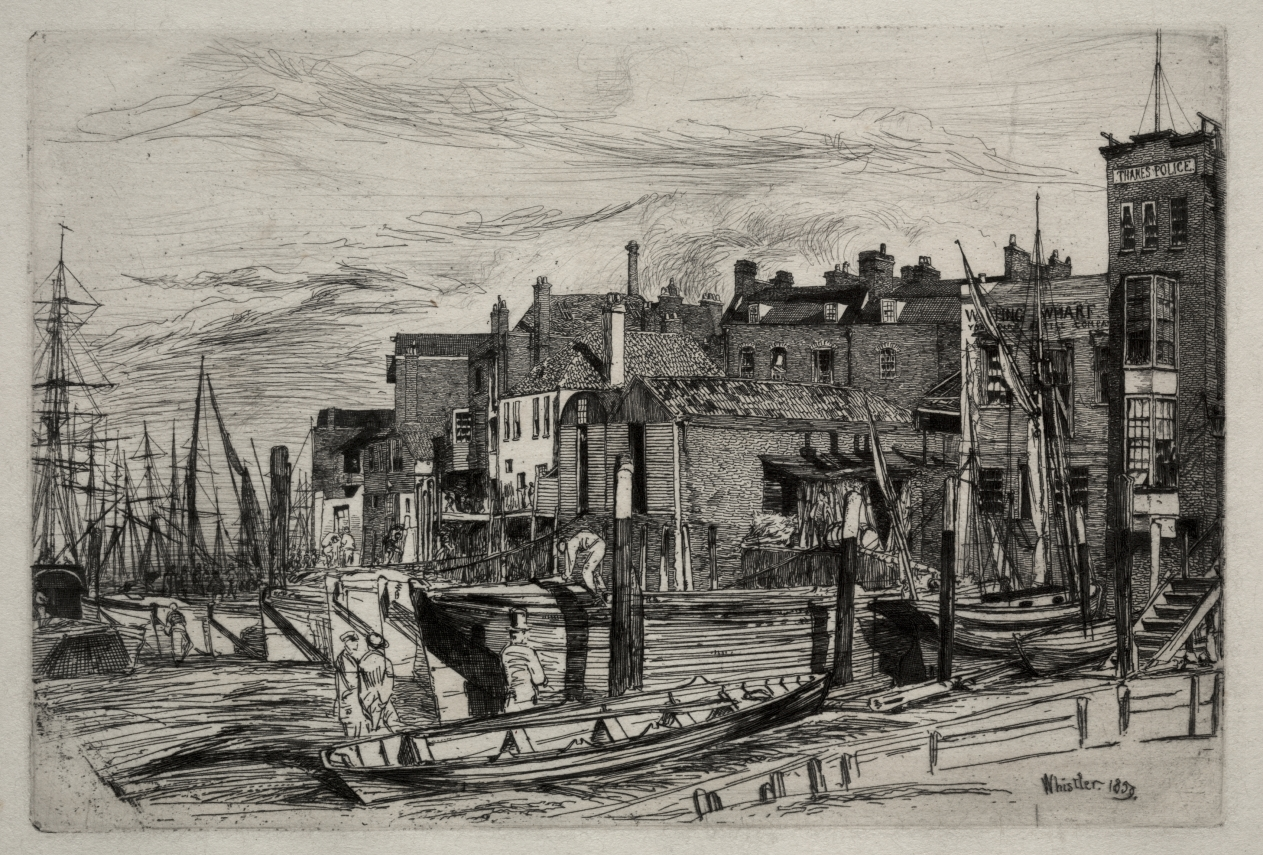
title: Thames Police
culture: America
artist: James McNeill Whistler (American, 1834–1903)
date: 1859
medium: etching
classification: Print